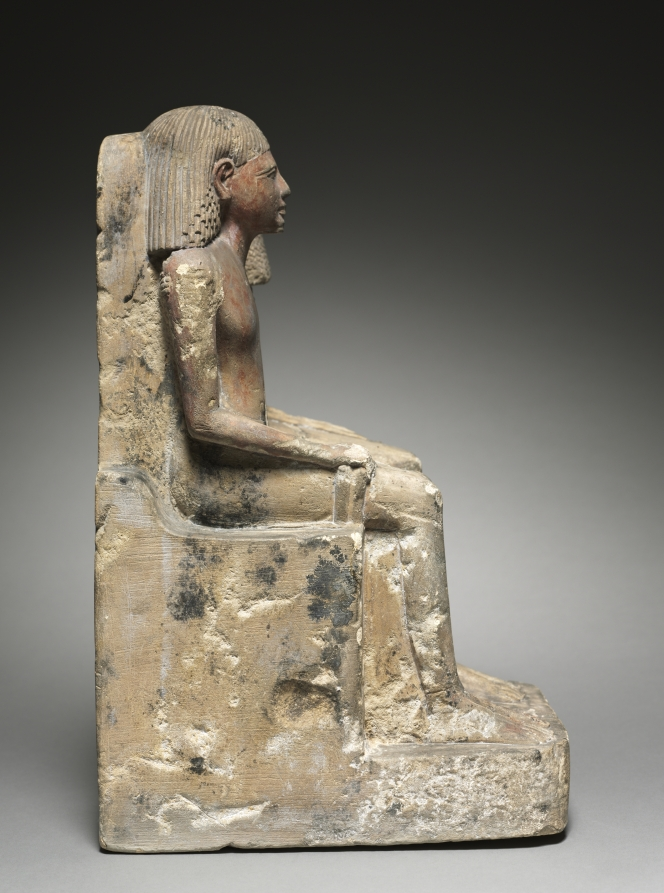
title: Seated Pair Statue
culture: Egypt, New Kingdom (1540–1069 BCE), Dynasty 18, reign of Tuthmosis III (1479–1425 BCE)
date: c. 1479–1425 BCE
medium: painted limestone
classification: Sculpture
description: Ka statues were the dwelling places for the spirits of the deceased. These sculptures—some larger than life-size—were placed in a niche in the back of the tomb.